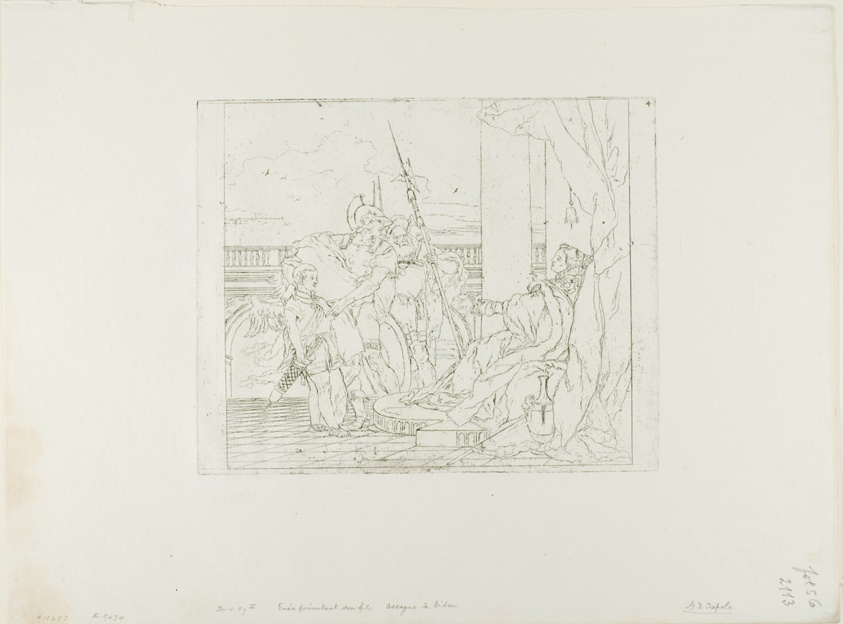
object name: Print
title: Aeneas Introduces His Son Ascanius to Dido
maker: Giovanni Domenico Tiepolo (Italian, 1727-1804); after Giambattista Tiepolo (Italian, 1696-1770)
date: after 1757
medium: Etching on paper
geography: Italy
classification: etching; print; prints and drawing